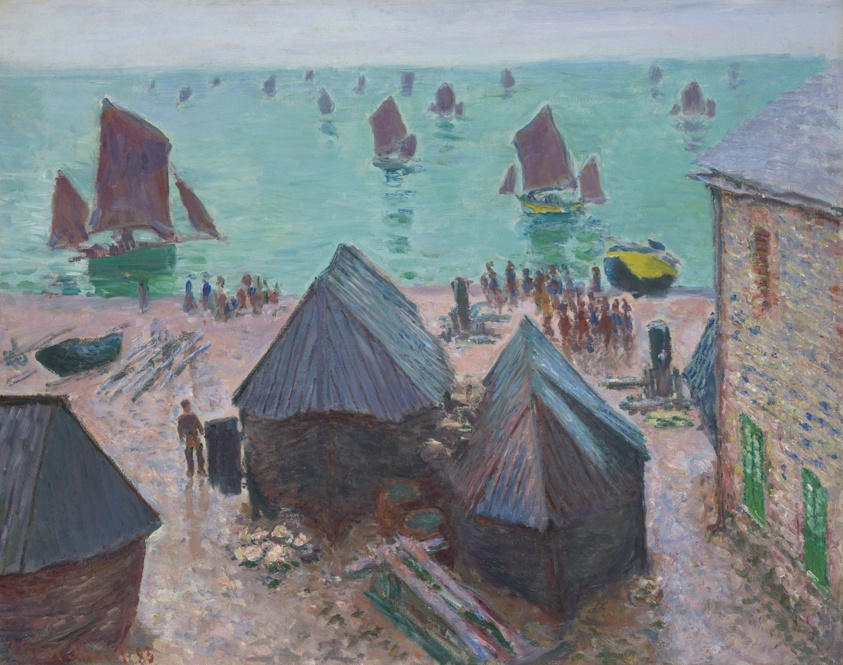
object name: Painting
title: The Departure of the Boats, Étretat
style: Impressionism, nineteenth century, 19th century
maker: Claude Monet (French, 1840–1926)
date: 1885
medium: Oil on canvas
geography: France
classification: painting; paint; oil paintings (visual works); oil on canvas; french; european painting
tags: seascapes, boats, France, water, beach, fishing, figures, people, ocean, building, buildings, sailing, landscapes, Century of Progress, world's fairs, Chicago World's Fairs